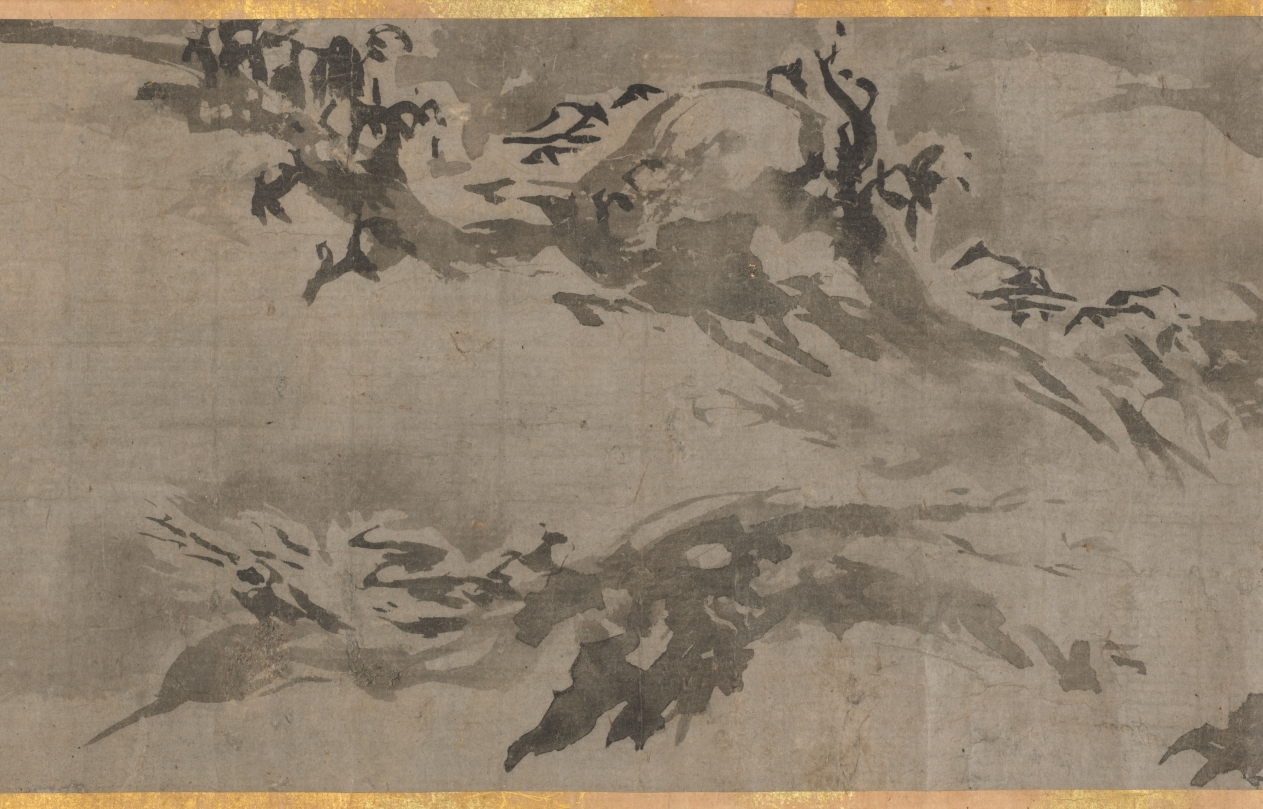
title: Eight Views of Xiao-Xiang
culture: Japan, Muromachi period (1392–1573)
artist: Sesson Shūkei (Japanese, c. 1492–c. 1577)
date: 1500s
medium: handscroll; ink on paper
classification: Painting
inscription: Signature and seal of artist at end of painting.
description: Eight Views of the Xiao and Xiang Rivers can be traced to 11th-century Chinese poems and paintings, the depiction of which had also become popular among Korean and Japanese painters. Xiao-Xiang refers to the region in present-day Hunan province where the Xiao and Xiang rivers converge. Few painters of the Eight Views had in fact seen the scenery; rather, they were trying to portray in ink and wash the lyrical qualities of dim light and a misty atmosphere typical of that region. Each of the poetic titles suggests a time of day, a season, or specific atmospheric conditions—subjects that challenged the abilities of the most talented artists. In this miniature painting (shukuzu) of the Muromachi period, Japanese Zen monk and painter Shukei Sesson depicted all eight views featured in Chinese prototypes: Wild Geese Descending to Sandbar; Returning Sails Off a Distant Coast; Mountain Market in Clearing Mist; River and Sky in Evening Snow; Autumn Moon over Dongting Lake; Night Rain on the Xiao and Xiang; Evening Bell from Mist-Shrouded Temple; and Fishing Village in Evening Glow.